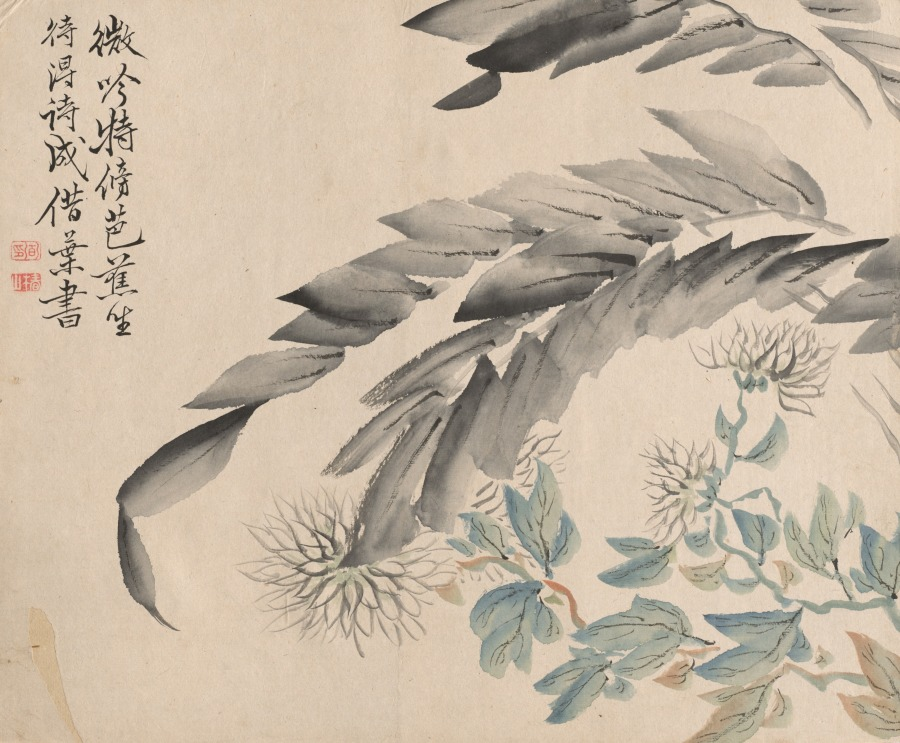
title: Banana Plant and Chrysanthemum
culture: Japan, Edo period (1615–1868)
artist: Tsubaki Chinzan (Japanese, 1801–1854)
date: c. 1845–54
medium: ink and color on paper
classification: Drawing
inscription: Inscription upper left corner.